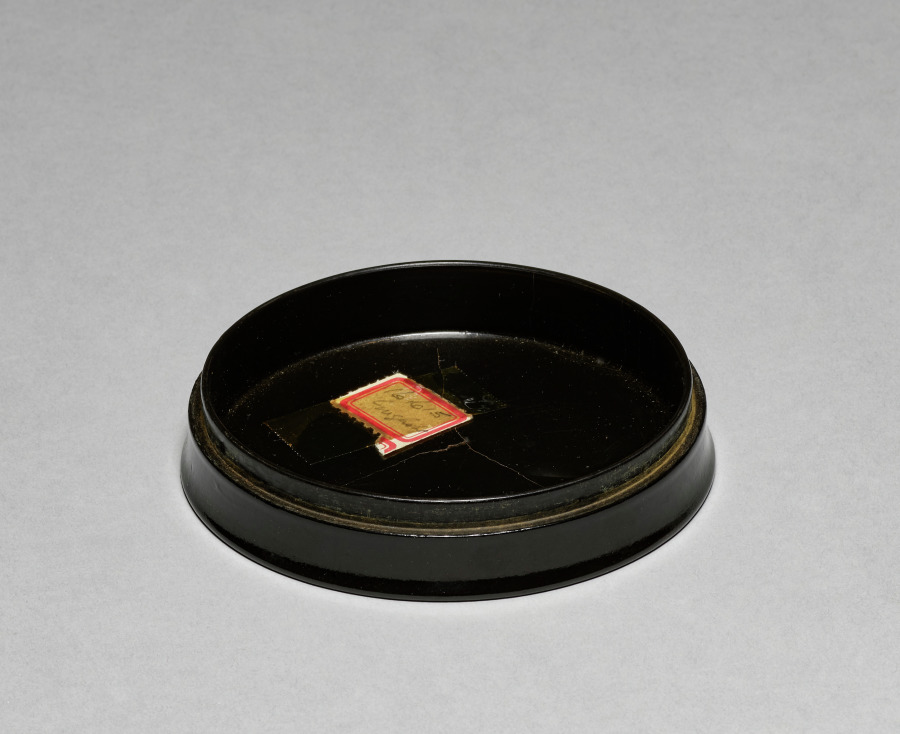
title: Box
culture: Germany, late 18th Century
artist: possibly studio or workshop of Johann Heinrich Stobwasser (German, 1740–1829)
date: late 1700s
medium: lacquered wood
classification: Miscellaneous